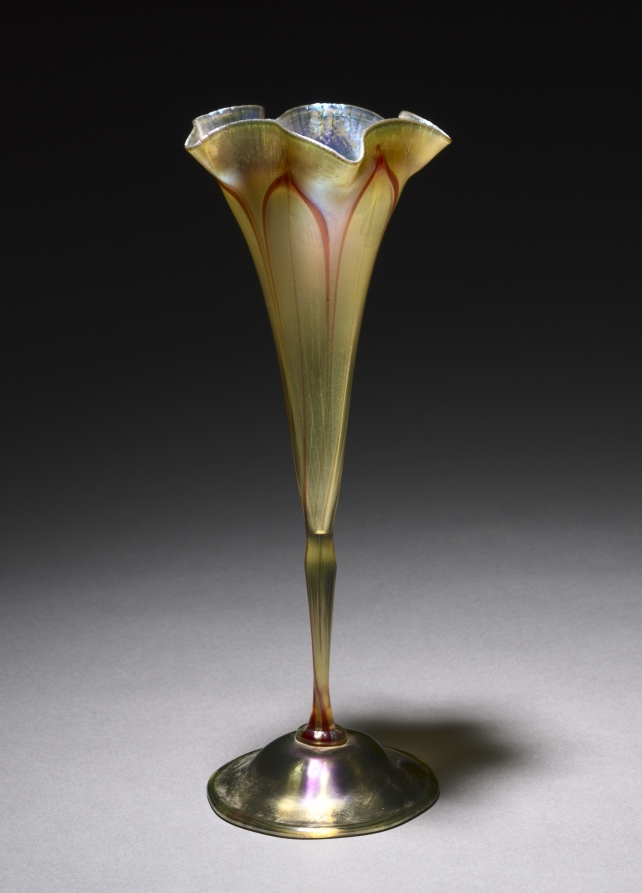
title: Vase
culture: America, New York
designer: Louis Comfort Tiffany (American, 1848–1933)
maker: Tiffany Studios (United States, New York, 1902–32)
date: c. 1905–10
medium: favrile glass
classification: Glass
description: When Louis Comfort Tiffany began collaborating with glass artists on new types of production, his aesthetic ambitions were finally realized in the development of Favrile glass, a term he created to imply “handmade.” Largely through his marketing ability, Favrile glass became America’s greatest contribution to the Art Nouveau style. His works were exhibited at international expositions; at galleries in major European cities, where his creations were bought by many museums; and in his store in Manhattan, known as the Tiffany Glass and Decorating Co., later Tiffany Studios. From the outset, Tiffany used Favrile glass in mosaic panels, stained glass windows, and his artistic line of table and floor lamps.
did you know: Vases in the shapes of exotic floral forms were among the most popular of Louis Comfort Tiffany's designs in glass.